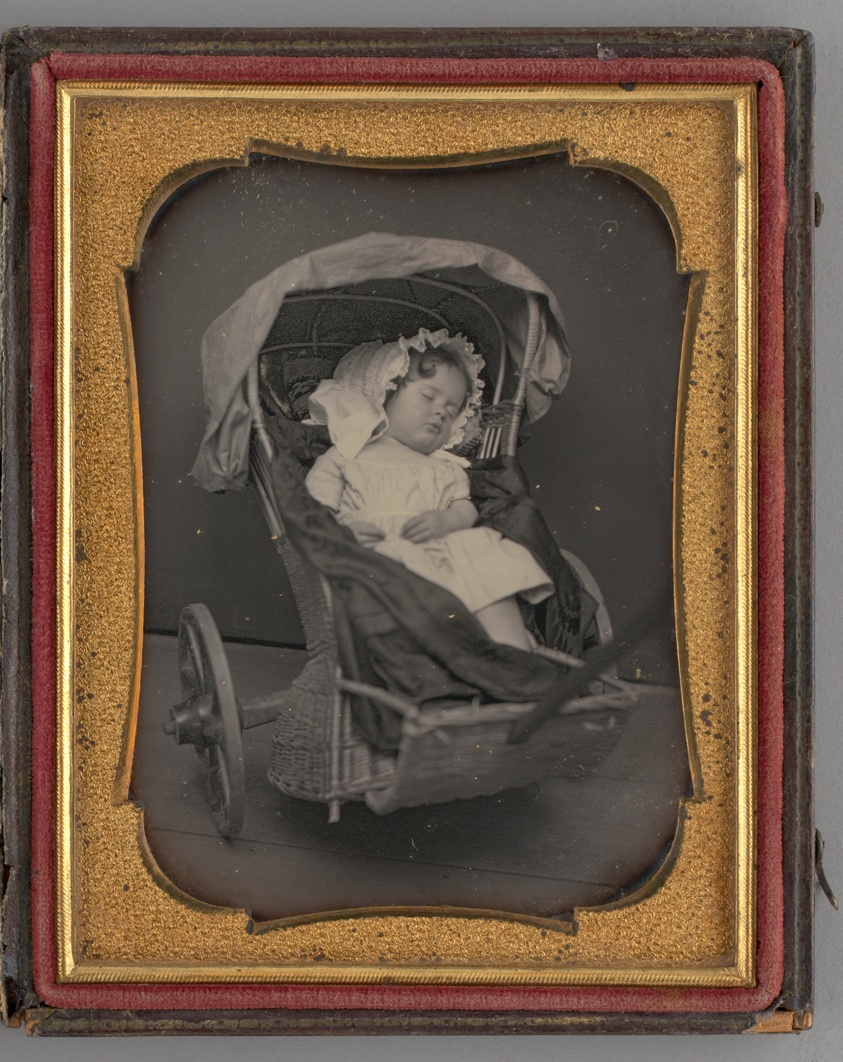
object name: Photograph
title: Untitled (Portrait of Sleeping Baby)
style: 19th century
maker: Unknown maker; American, 19th century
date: 1851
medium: Daguerreotype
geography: United States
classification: portrait; photograph; photographic process; photography; portrait; daguerreotype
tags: lundberg collection, portraits, portraits: child subject, babies